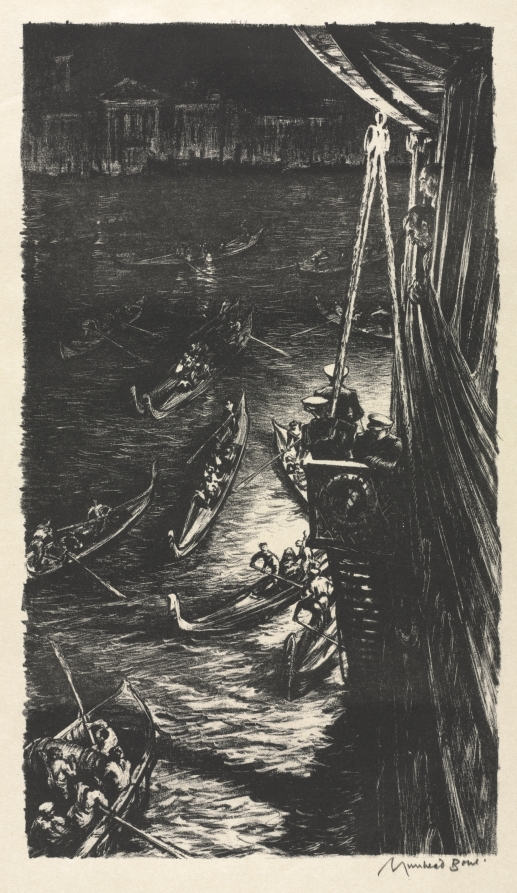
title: Midnight at Venice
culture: England, 20th century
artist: Muirhead Bone (British, 1876–1953)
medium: lithograph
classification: Print